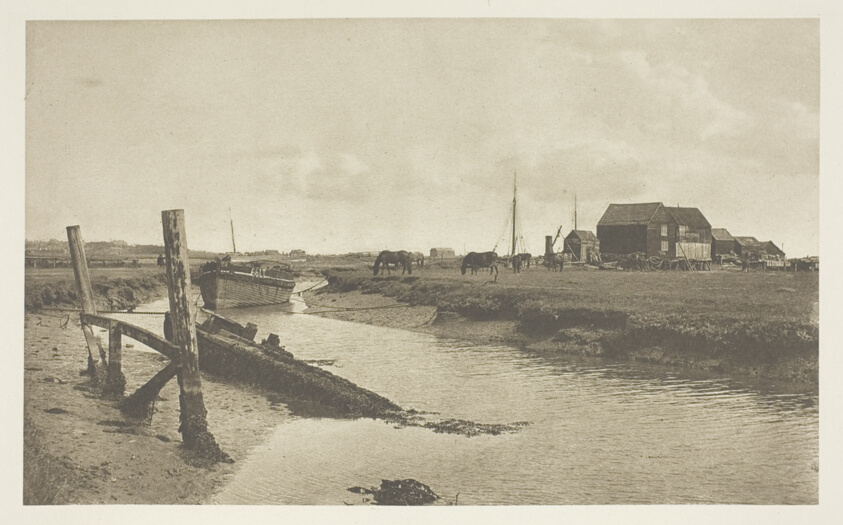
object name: Photograph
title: A Tidal River, East Coast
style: 19th century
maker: J. B. B. Wellington (English, 1858–1939)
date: 1880/90, printed April 1890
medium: Photogravure, from "Sun Artists, No. 3" (1890)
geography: England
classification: photogravure; photomechanical process; photography; photograph